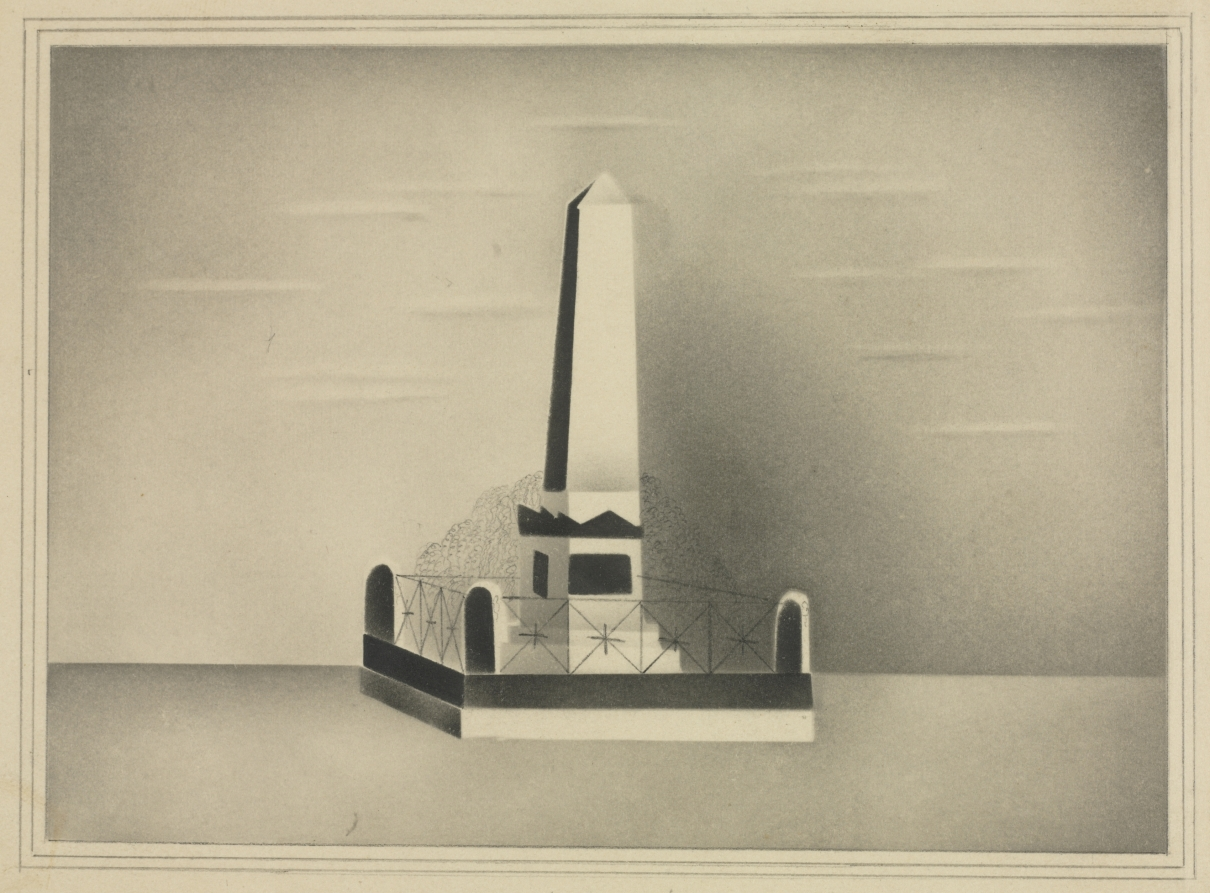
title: Tomb of Messina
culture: America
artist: Mary Altha Nims (American, 1817–1907)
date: 1800s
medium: pencil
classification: Drawing